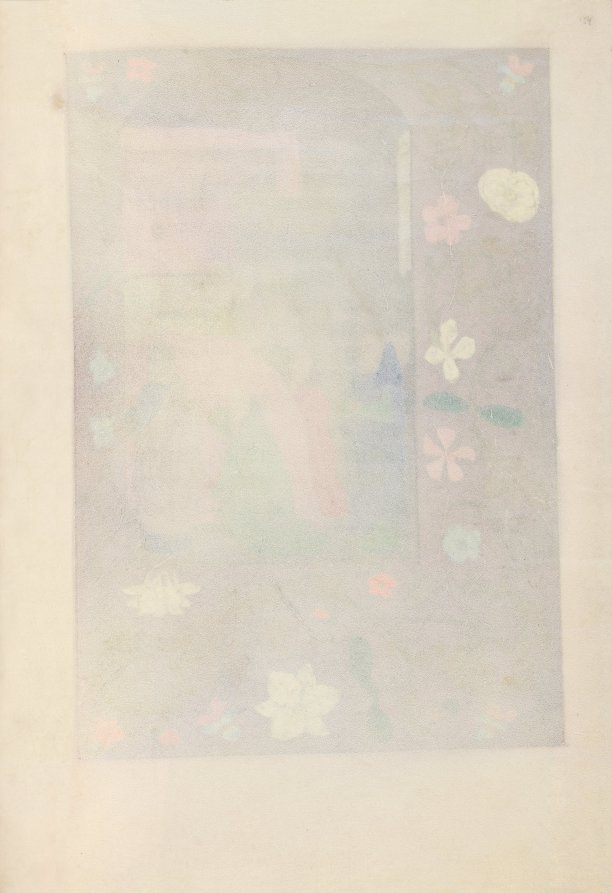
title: Hours of Queen Isabella the Catholic, Queen of Spain: Fol. 154r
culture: Flanders, Ghent and Bruges, late 15th century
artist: Master of the First Prayerbook of Maximillian (Flemish, c. 1444–1519)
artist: and Associates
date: c. 1500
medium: ink, tempera, and gold on vellum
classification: Bound Volume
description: This manuscript was illuminated by a circle of at least five highly organized manuscript painters active in the Flemish cities of Ghent and Bruges. The principal illuminator was Alexander Bening, who painted the majority of the book's miniatures. Manuscripts produced by this circle of artists are renowned for the decoration of their borders, which typically feature a rich variety of realistically-painted flowers, birds, and butterflies. This prayer book, called a book of hours, was intended not for a cleric, but for the private devotions of a lay person-in this case, Isabella the Catholic, Queen of Spain (1451-1504). Isabella's coat of arms embellishes the book's frontispiece. It is unlikely that the book was commissioned by the Queen herself; rather, she probably received it as a diplomatic gift from someone courting her patronage, perhaps Cardinal Francisco Jimenez de Cisneros. A Franciscan friar, Jimenez was dependent upon Isabella for his advancement, first to the post of Queen's confessor in 1492, and then to Archbishop of Toledo in 1495.